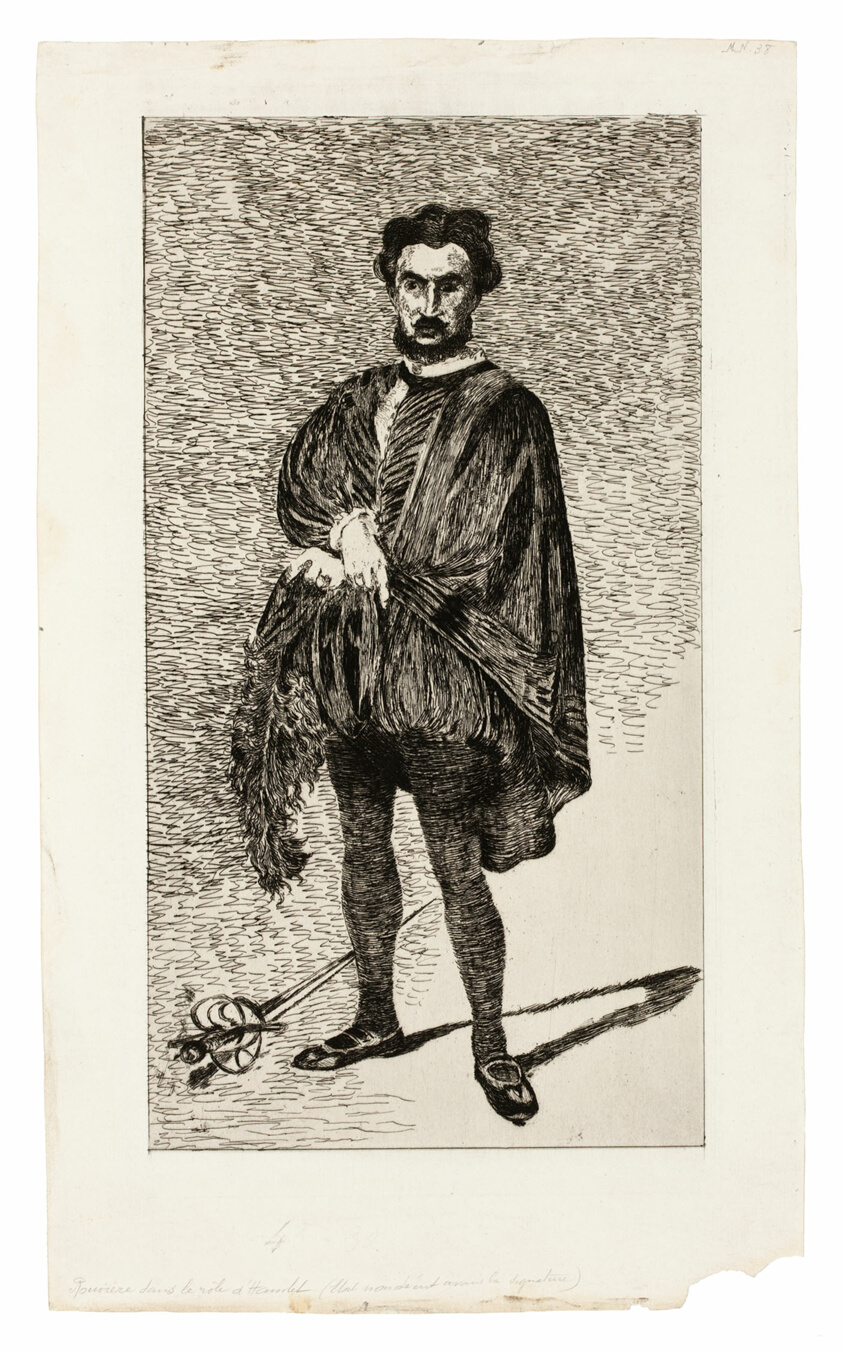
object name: Print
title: The Tragic Actor (Rouvière in the role of Hamlet)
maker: Édouard Manet (French, 1832-1883)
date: 1865–66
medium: Etching and plate tone in black on ivory laid paper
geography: France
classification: etching; print; prints and drawing